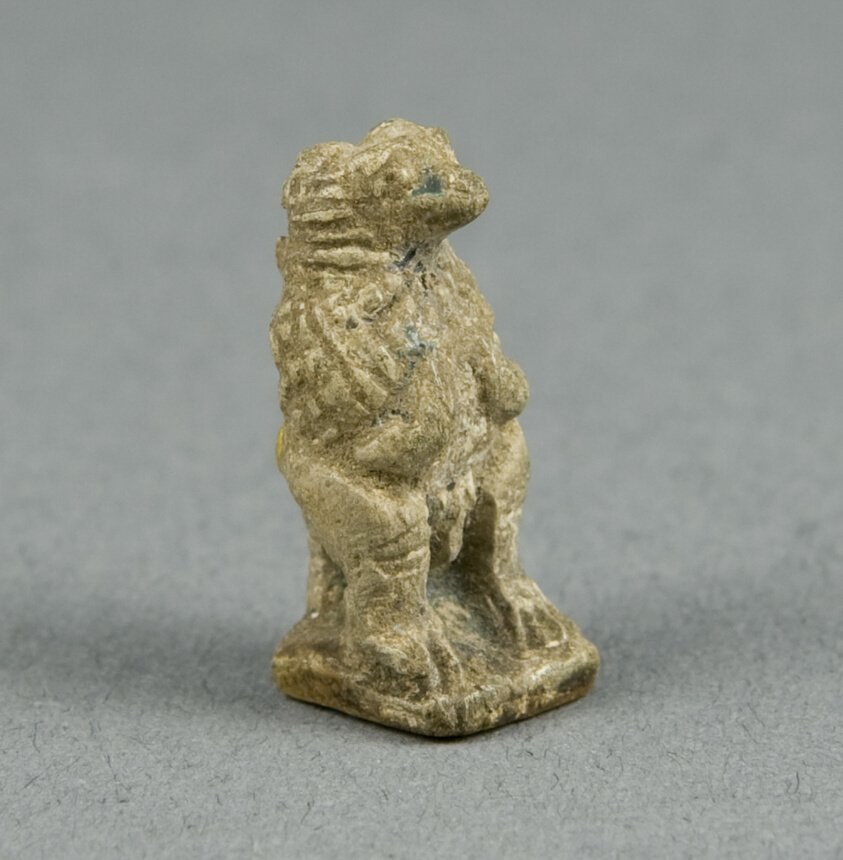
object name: Costume and Accessories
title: Amulet of the God Thoth as a Seated Baboon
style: late period (egyptian), ancient, egyptian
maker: Egyptian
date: Late Period (?), Dynasties 26–31 (664–332 BCE)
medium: Steatite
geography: Egypt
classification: amulet; jewelry; ceramics; ancient art; costume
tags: gods (deities), deities, baboon